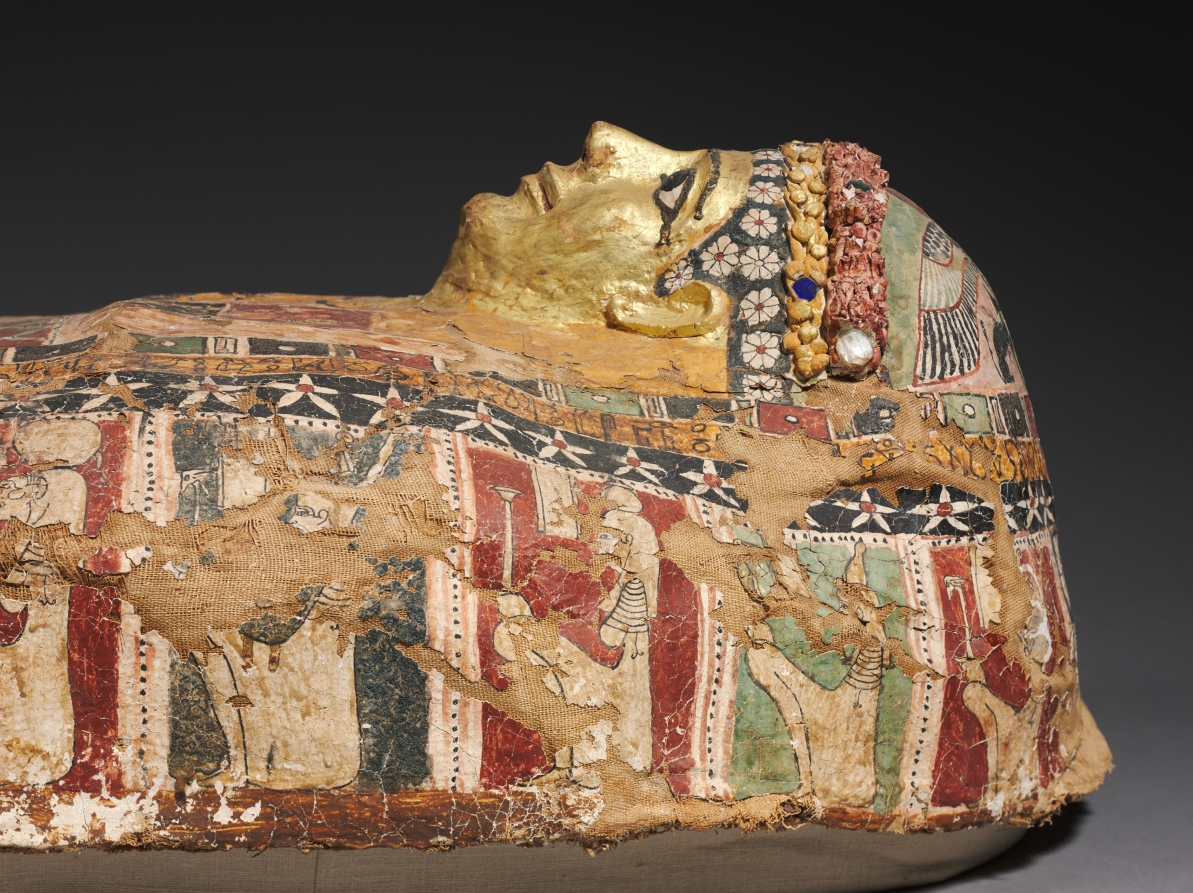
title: Cartonnage Mummy Case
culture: Egypt, Greco-Roman period (332 BCE–395 CE), Ptolemaic dynasty (305–30 BCE)–Roman empire (30 BCE–395 CE)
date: c. 50 BCE–50 CE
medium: cartonnage, painted and gilded, with glass inlays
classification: Funerary Equipment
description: This mummy case is made of cartonnage, a material similar to papier-mâché, but using layers of linen rather than paper. Cartonnage mummy cases such as these are contemporary with funerary portraits painted on wood or linen, although they present a very different appearance. The face, modeled in plaster, is bland and idealized, although the effect of the gilding and glass inlays is quite dazzling. The body is painted with traditional, age-old funerary motifs: the god Osiris, seated and mummiform; the fetish of Abydos, holy city of Osiris, flanked by standing deities (Thoth and Shu); a Horus falcon with outspread wings, and the bark of Sokar. Below these are the sandaled feet of the deceased. On the sides are rows of seated deities. On the top of the head are a winged scarab beetle flanked by Anubis jackals. On the foot are painted the soles of the deceased’s sandals, flanked by scorpions for protection.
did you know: This coffin is smaller and later in date than the other coffins in this gallery. It is made of cartonnage, which used layers of linen to create a material similar to papier-mâché. The painted portrait head displays the influence of Roman portraiture at this time and incorporates both gilding and glass inlays. Despite the fragile materials, this mummy case survived due to the very dry desert climate in which it was found.